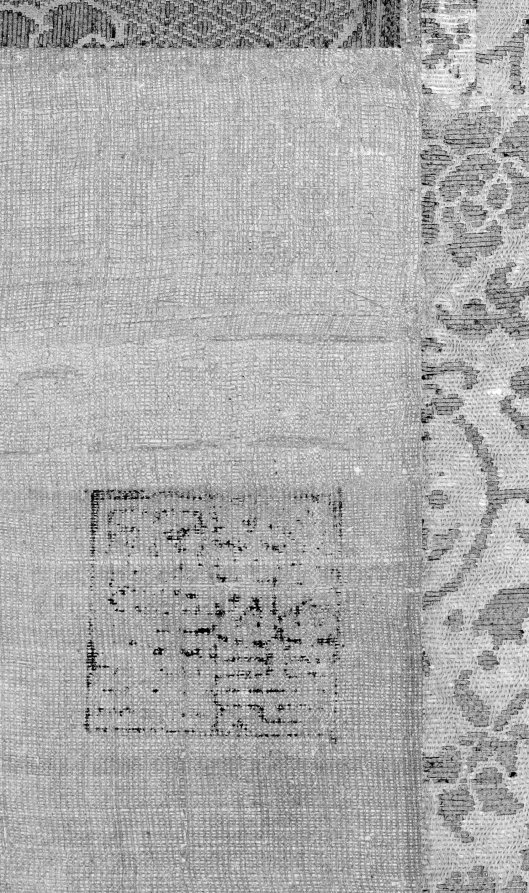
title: Tiger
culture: China, Southern Song dynasty (1127-1279)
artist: Fachang Muqi (Chinese, 1220–1280)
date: c. 1250–79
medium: Hanging scroll; ink and slight color on silk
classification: Painting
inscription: 道有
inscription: 雜華室印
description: The dragon and tiger are tied to the philosophical concept of yin and yang, which describes opposite but complementary forces. The dragon occupies a tiered background of waves and mist. Its luminous head emerges from the darker passages, and its narrow twisting body is serpent-like. By contrast, the close-up view of the tiger emphasizes its bulk. The tiger bends its head to lick its paw while its tail curls in the foreground. In their original Chan Buddhist context, this pair of scrolls likely flanked a central image, like the Bodhisattva Guanyin. The silk has darkened over the centuries, and the slight reddish shading in the tiger’s tongue and nose has faded.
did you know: Fachang Muqi's ink paintings, like this pair, were highly appreciated and collected in Japan.